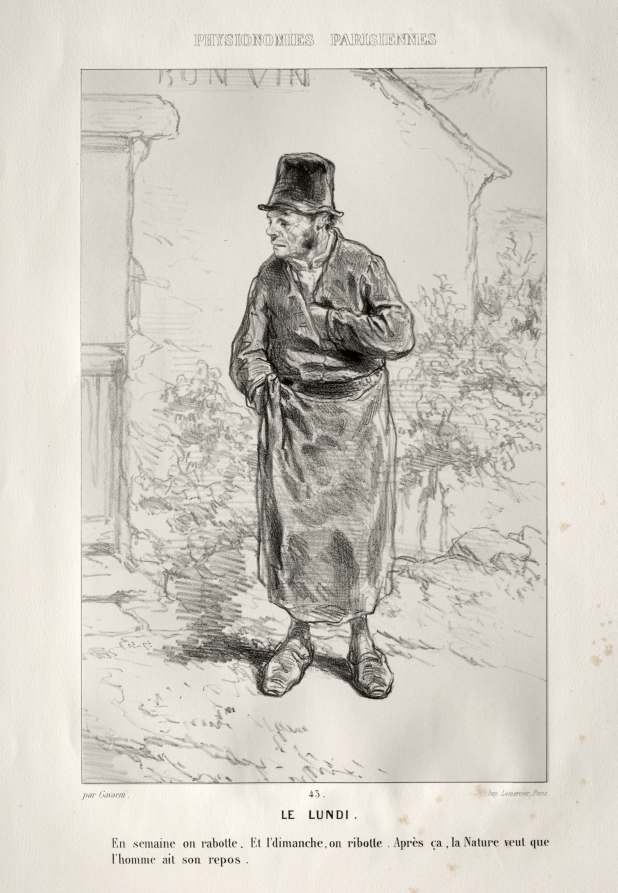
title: Le Lundi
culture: France, 19th century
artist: Paul Gavarni (French, 1804–1866)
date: c. 1858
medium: lithograph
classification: Print